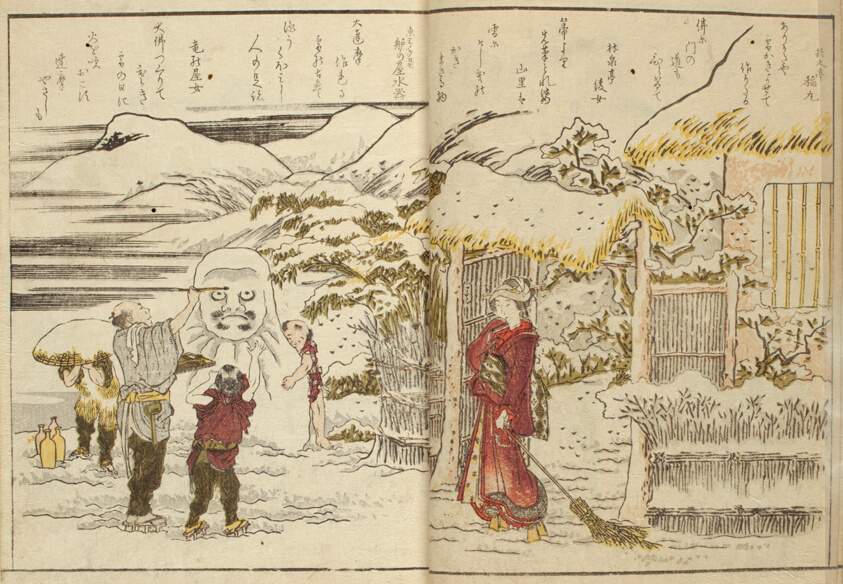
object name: Book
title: Ehon ryohitsu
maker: Katsushika Hokusai (1760-1849); Japanese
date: 1820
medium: Color woodblock printed book, one volume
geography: Japan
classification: book